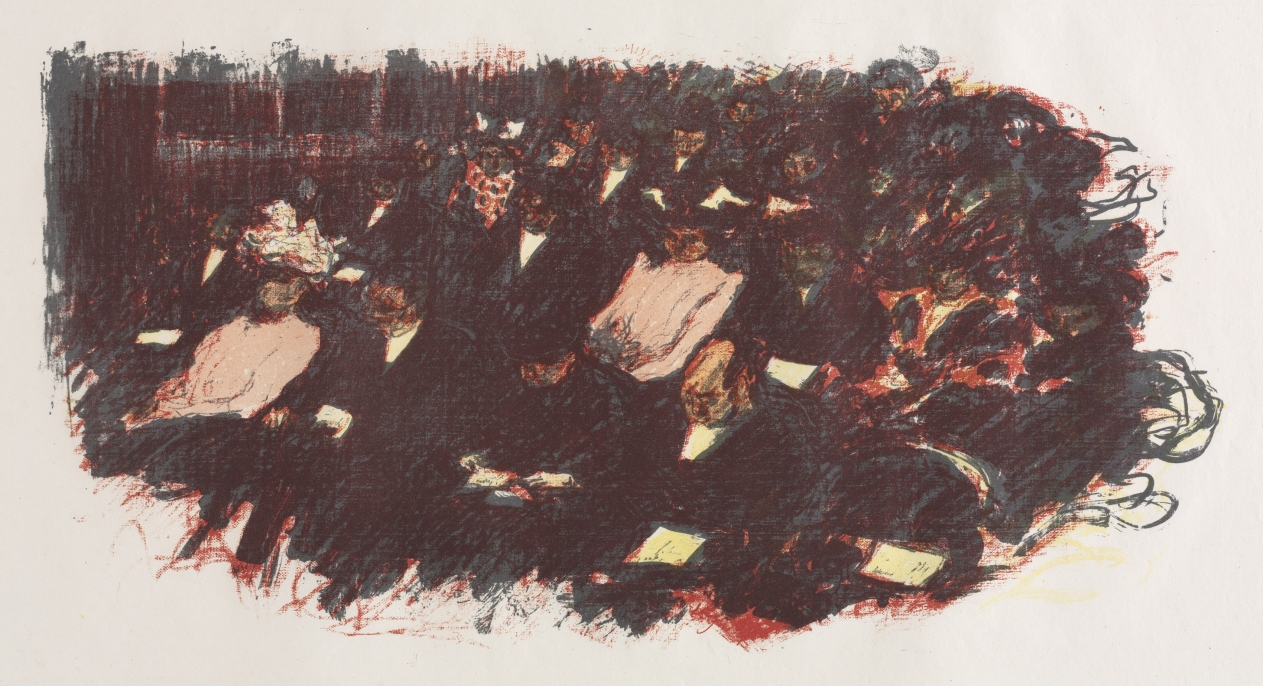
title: At the Theatre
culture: France, 19th century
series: Some Scenes of Parisian Life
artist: Pierre Bonnard (French, 1867–1947)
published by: Published by Ambroise Vollard; Printed by Auguste Clot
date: 1899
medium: lithograph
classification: Print